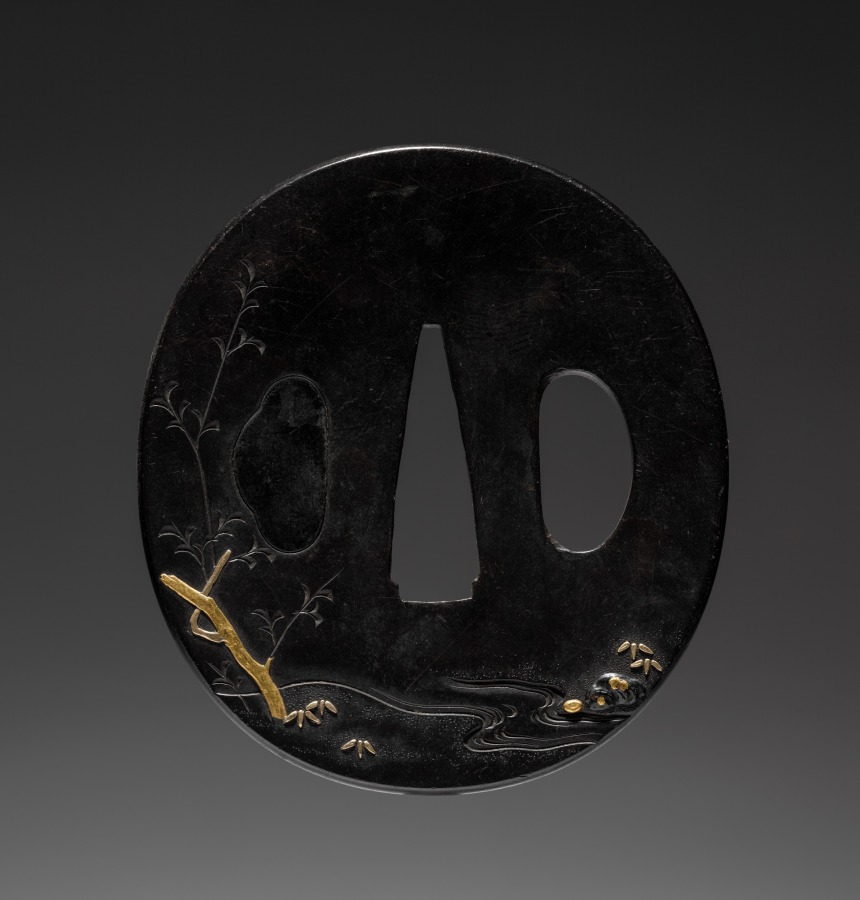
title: Sword Guard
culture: Japan, Edo period (1615–1868)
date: late 1600s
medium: iron (Nara type)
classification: Arms and Armor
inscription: signed "Nara Toshiharu."